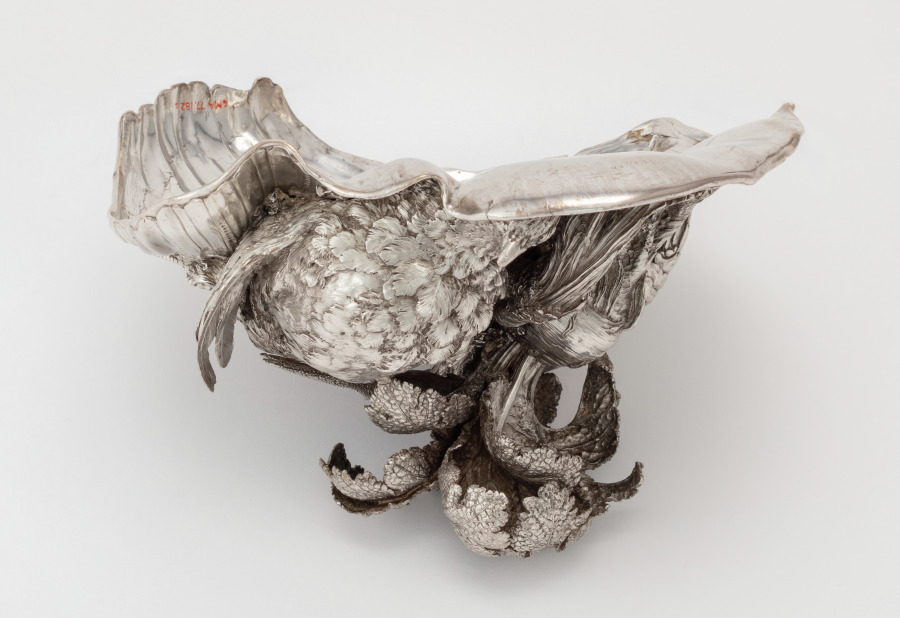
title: Cover for a Tureen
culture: France, Paris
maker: Henry Adnet (French, 1745)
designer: Juste-Aurèle Meissonnier (French, 1695–1750)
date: 1735–38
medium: silver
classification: Silver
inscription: engraved Meissonnier signature.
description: See entry for cover record 1977.182.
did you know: The langoustine, pigeon, and vegetables were cast using real examples giving the silver copies lifelike detail and appearance.